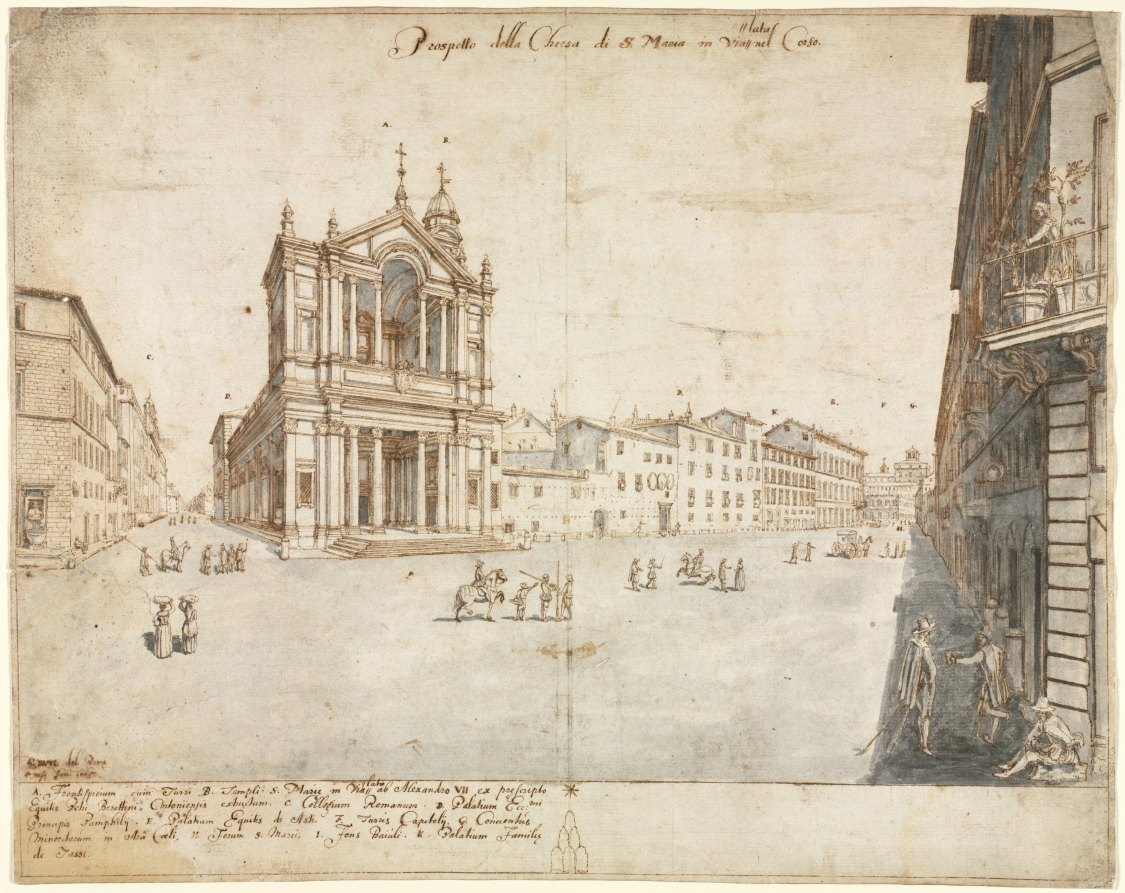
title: Eighteen Views of Rome: Santa Maria in Via Lata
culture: Flanders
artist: Lievin Cruyl (Flemish, c. 1640-c. 1720)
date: 1665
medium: pen and brown ink and brush and gray wash over graphite; framing lines in brown ink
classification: Drawing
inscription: signed, lower left, in brown ink: [artist monogram: LC] RVYL del. Romæ / mense Jan. 1665. ; by artist, upper center, in brown ink: Prospetto della Chiesa di S. Maria in Via// [double slashes acting as insert mark for addition to inscription, by artist, directly above: //lata] nel Corso. ; by artist, throughout composition, in brown ink: [the letters A-K] ; by artist, lower left, in brown ink: A. Frontispicium cum Turri B. Templi S. Mariæ in Via// [double slashes acting as insert mark for addition to inscription, by artist, directly above: //lata] ab Alexandro VII ex prescripto / Equitis Petri Berettini Cortonensis extructum. C. Collegium Romanum. D. Palatium Ecc:mi [mi in superscript] / Principis Pamphilij. E. Palatium Equitis de Asti. F. Turris Capitolij G. Conventus / Minoritarum in Arâ Coeli. H. Forum S. Marci. I. Fons Baiùli. M. Palatium Familiæ / de Tassi. ; VERSO, lower left, in brown ink: [S45 ?] [partially masked, sideways] ; ON STRIPS OF PAPER MOUNTED TO VERSO, lower center, in graphite: A20982 ; lower right, in graphite: E.9